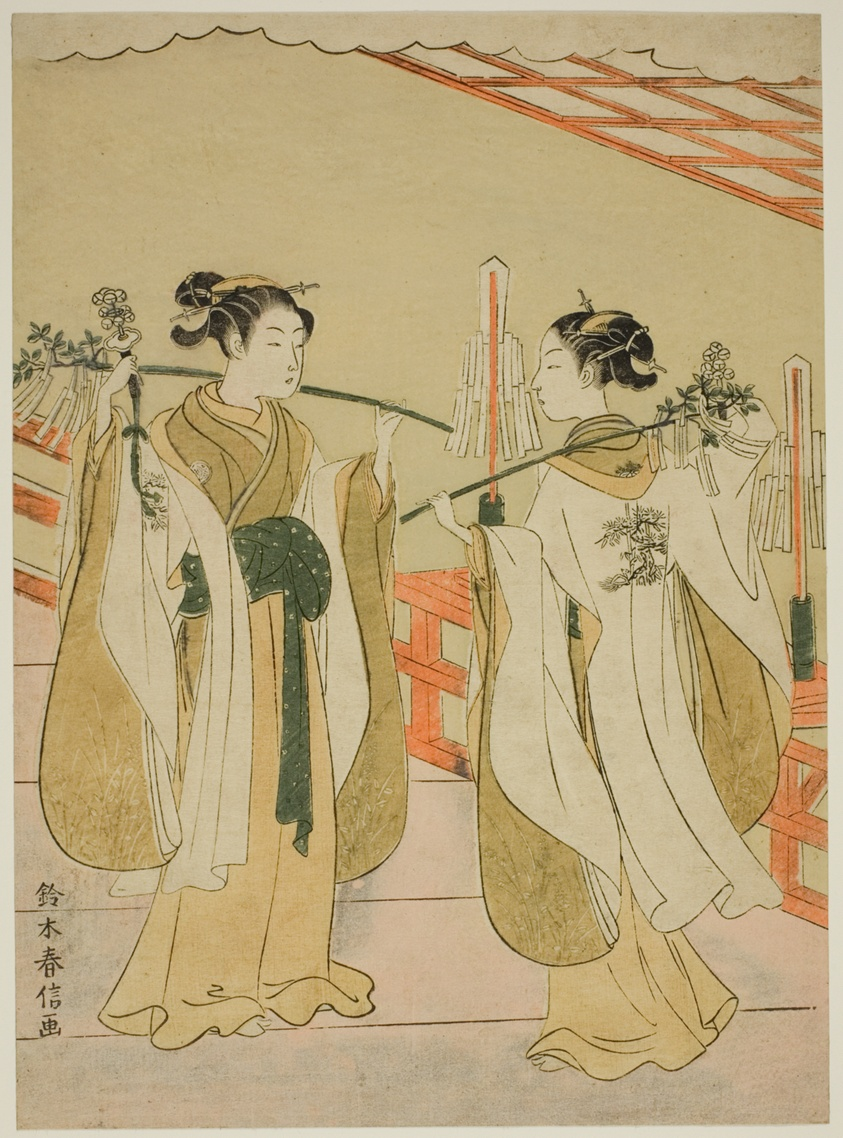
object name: Print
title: Shrine Maidens Onami and Ohatsu Dancing at Yushima Tenjin Shrine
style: Japanese (culture or style)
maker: Suzuki Harunobu 鈴木 春信; Japanese, 1725 (?)-1770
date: c. 1769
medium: Color woodblock print; chuban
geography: Japan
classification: woodblock print; print; asian art